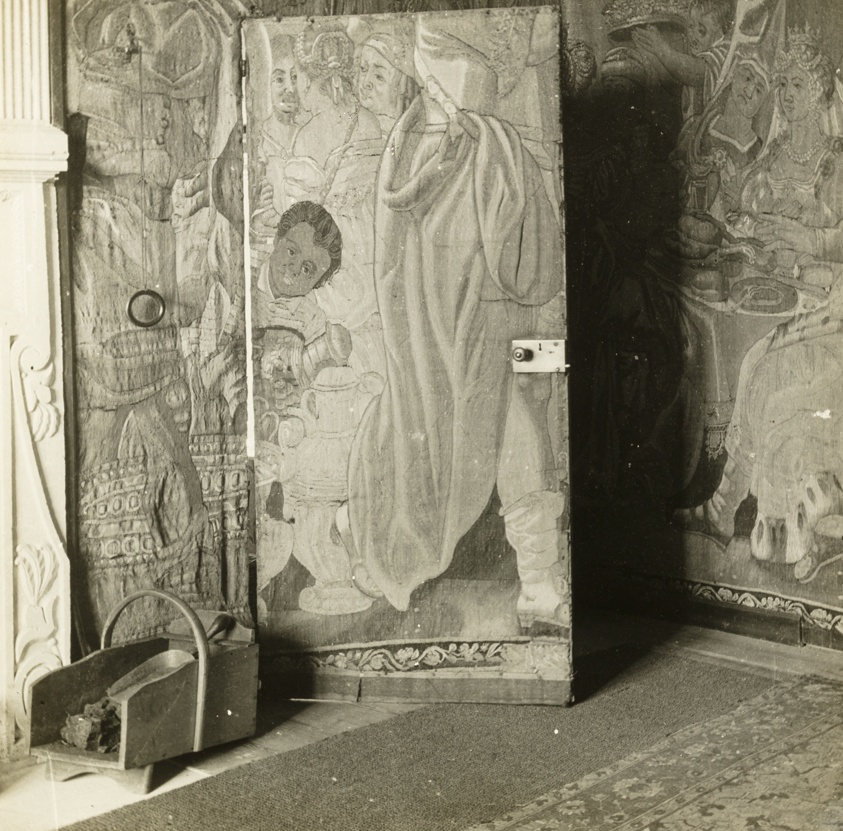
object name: Photograph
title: Kelmscott Manor: In the Tapestry Room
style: Pictorialism, 19th century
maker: Frederick H. Evans (English, 1853–1943)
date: 1896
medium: Lantern slide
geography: England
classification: photograph; photography